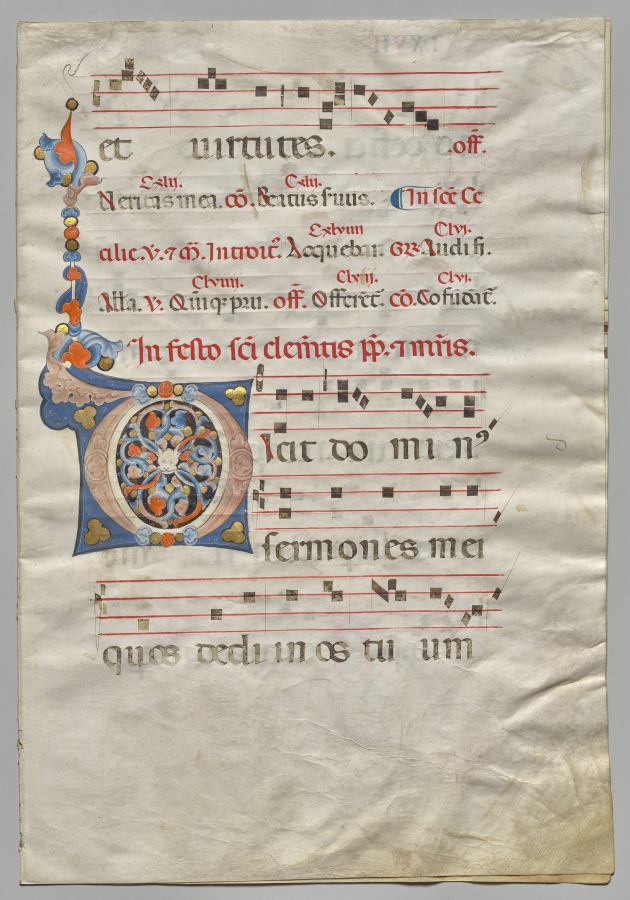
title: Bifolio from a Gradual: Initial (G) with Christ, the Virgin, and Apostles and Initial (O) (recto)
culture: Italy, Siena(?)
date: c. 1300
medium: Ink, tempera, and gold on vellum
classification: Manuscript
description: The large decorated initial G introduces the text, Gaudeamus omnes in Domino (Let us rejoice in the Lord). It is the beginning of the opening prayer, or introit, of the Mass for the Feast of All Saints (November 1). The figures within the initial include Christ, the Virgin Mary, and various saints.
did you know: Words written in red ink, called rubrics, indicate titles and chapter headings that are not part of a manuscript’s main text.